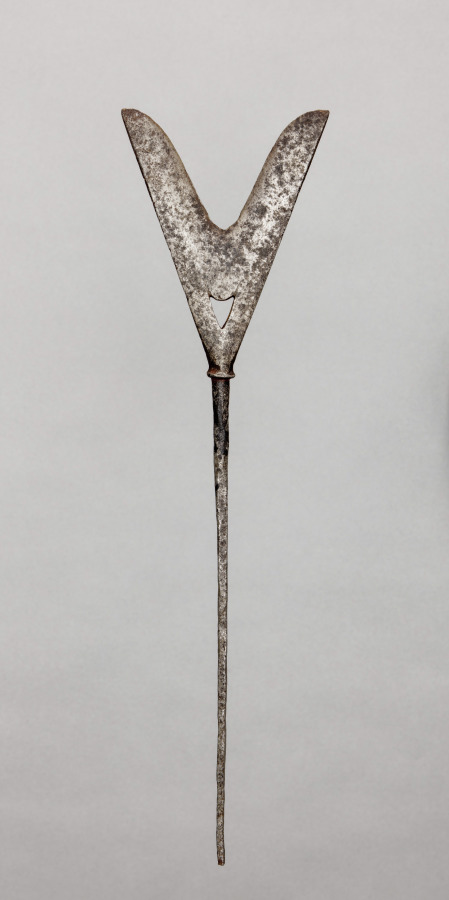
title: Arrow Head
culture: Japan, Edo period (1615–1868)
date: 1600s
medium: iron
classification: Arms and Armor